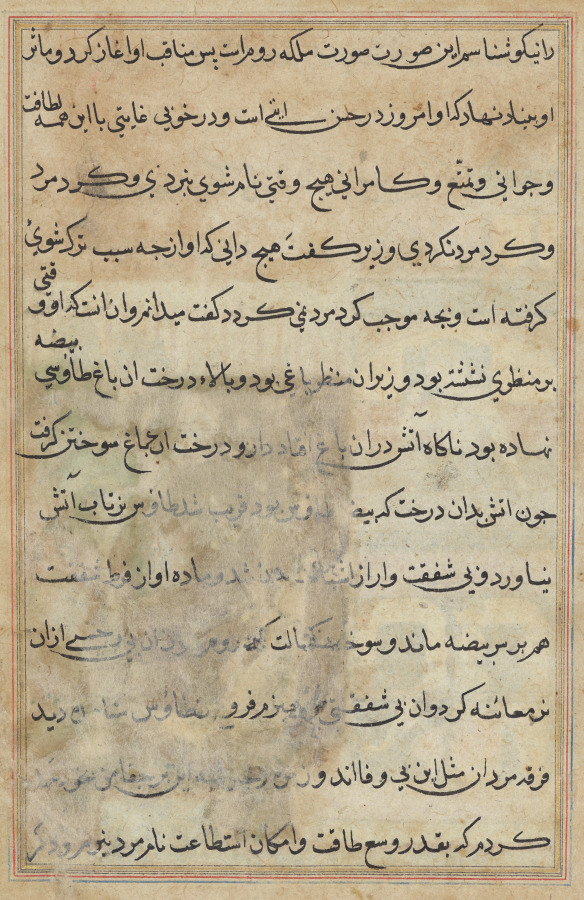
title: Page from Tales of a Parrot (Tuti-nama): text page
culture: Mughal India, court of Akbar (reigned 1556–1605)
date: c. 1560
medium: gum tempera, ink, and gold on paper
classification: Painting